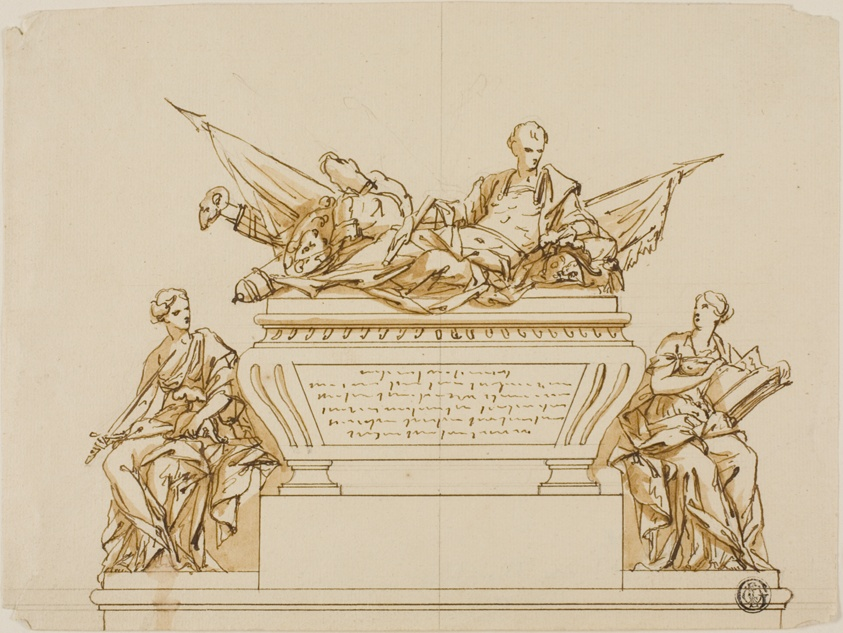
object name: Drawing and Watercolor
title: Unexecuted Design for the Monument to the First Duke of Marlborough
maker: John Michael Rysbrack (Flemish, 1693-1770)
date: c. 1733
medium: Pen and brown ink, with brush and brown wash, over graphite, on cream laid paper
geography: Flanders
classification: pen and ink drawings; drawings (visual works); prints and drawing